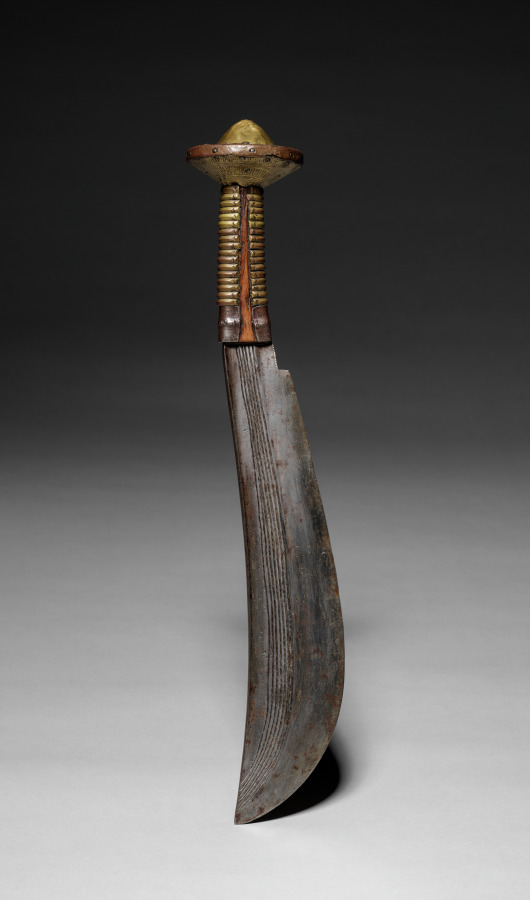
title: Knife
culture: Africa, Central Africa, Democratic Republic of Congo, unknown maker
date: 1800s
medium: Iron, wood, and copper alloy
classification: Arms and Armor